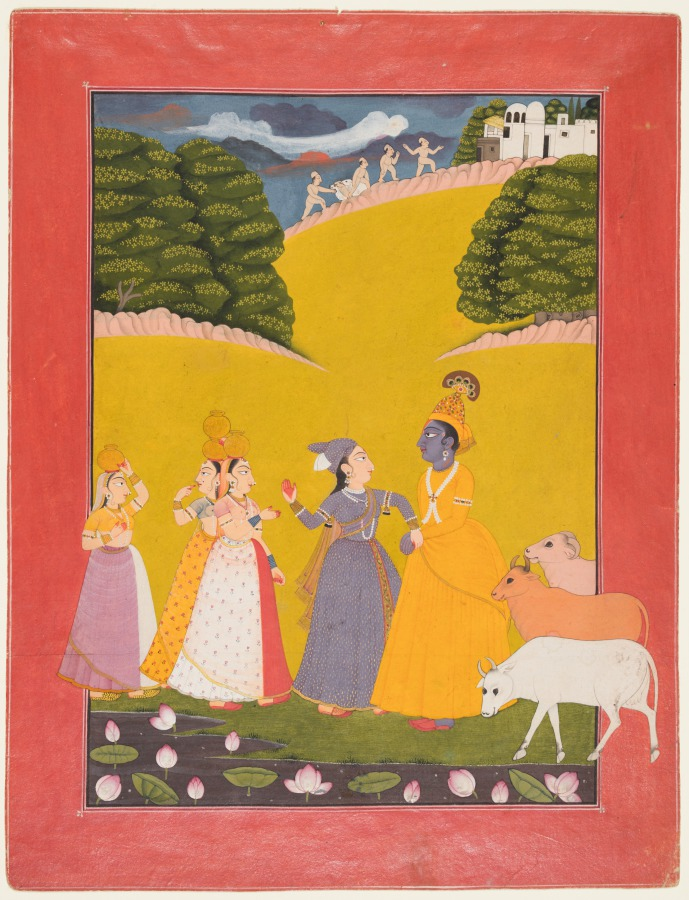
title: Taking of the toll, Dana-Lila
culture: Northern India, Pahari kingdoms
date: c. 1760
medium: Gum tempera and gold on paper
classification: Painting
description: Radha, the blue god Krishna’s beloved, raises one hand, reddened with henna (temporary natural dye), to strike him. Cows and her companions look on. This interlude is based on a devotional poem written by Dev Datt (about 1673–1745), in which he imagines this scene. Radha has dressed up as a soldier of the evil tyrant Kamsa. She shouts, “You are accused of taking the toll from milkmaids. . . . You are a traitor!” In the distance at the top of the painting, Krishna’s friends, who do not know that the couple is playing, run away in fear.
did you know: One milkmaid points to her mouth in a gesture of surprise.